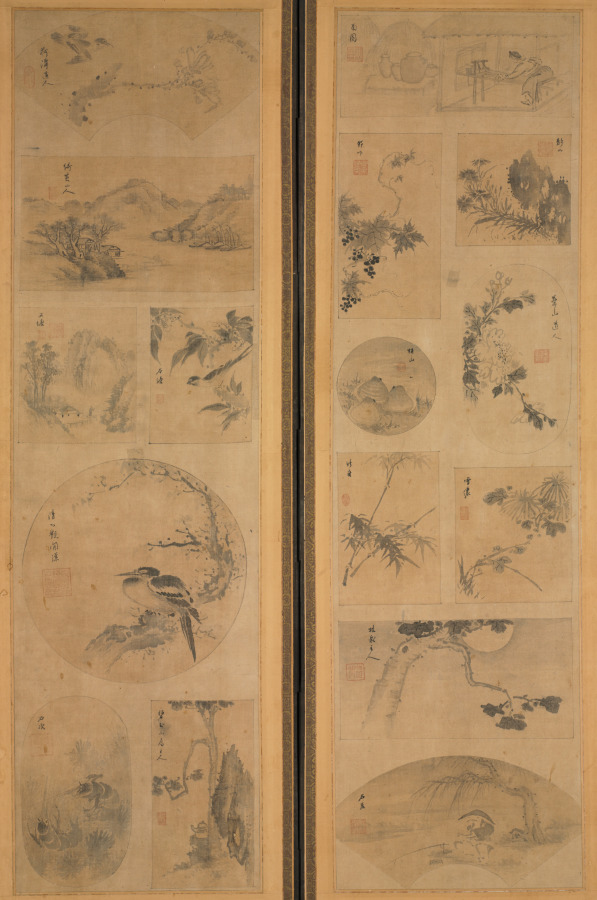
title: Painting of One Hundred Themes (obverse)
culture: Korea, Joseon dynasty (1392–1910)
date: late 1800s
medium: Ten-panel folding screen affixed with album leaves (obverse), calligraphy (reverse), ink and color on silk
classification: Painting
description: This screen depicts paintings on one side and poems on the other—an economical format often used in Korea to allow the viewer to enjoy both sides of one screen. The front features an assortment of bird-and-flower, landscape, and figural paintings executed according to the brush manner of more than 50 artists. A calligrapher has brushed several Chinese poems about the four seasons on the reverse side, among them "Composing in the Daytime of Summer" by Tang poet Liu Zongyuan (773–819) and "Composing when Spring Begins" by Song scholar Zhang Shi (1133–1180).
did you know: Depicting small images of various subjects became one of the most popular types of painting toward the end of the 19th century.